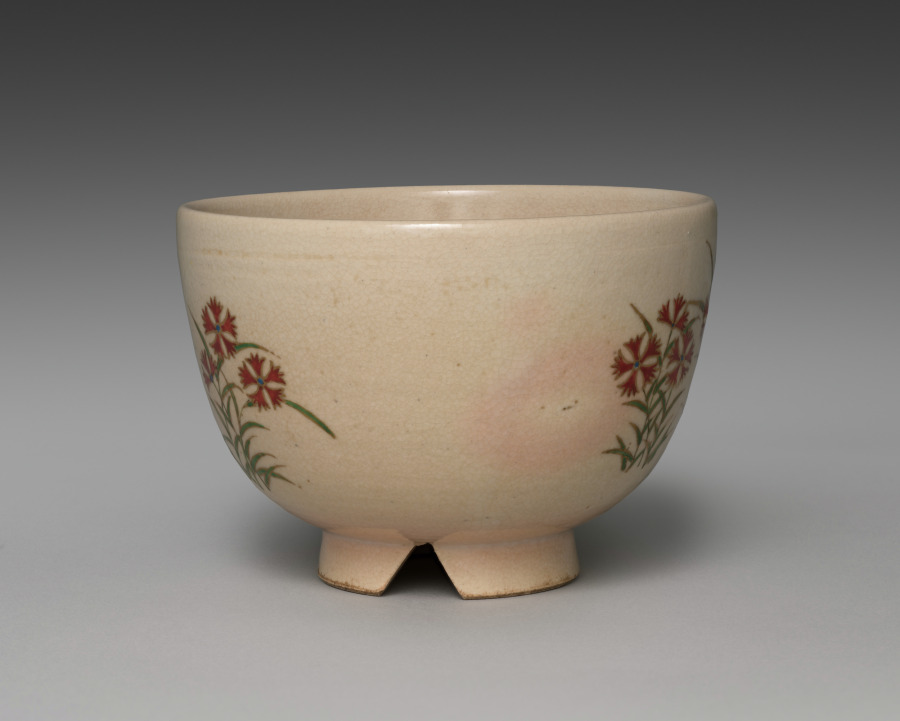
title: Teabowl with Pinks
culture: Japan, Meiji period (1868–1912)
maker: Seifū Yohei III (Japanese, 1851–1914)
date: 1893–1914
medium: Stoneware with crackled glaze and overglaze color enamel and gold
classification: Ceramic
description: This teabowl, for use in chanoyu, is a good example of Yohei III’s mastery of the techniques involved in producing Kyoto ware. The painting of the pinks, with their blue centers, bright red petals, and green leaves, is carefully controlled with crisp gold borders throughout. There is crackling in the transparent glaze and obvious, thick dripping of the milky glaze over the outside of the mouth of the bowl. The pink spots would have appeared in the clay during firing, and the bottom of the inside of the bowl is entirely pink. A triangular wedge has been cut away from the foot, and a gently impressed band rings the bowl beneath the rim.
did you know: The vessel comes with a bespoke brocade pouch with a silk fastening cord, as is customary for Japanese teabowls.